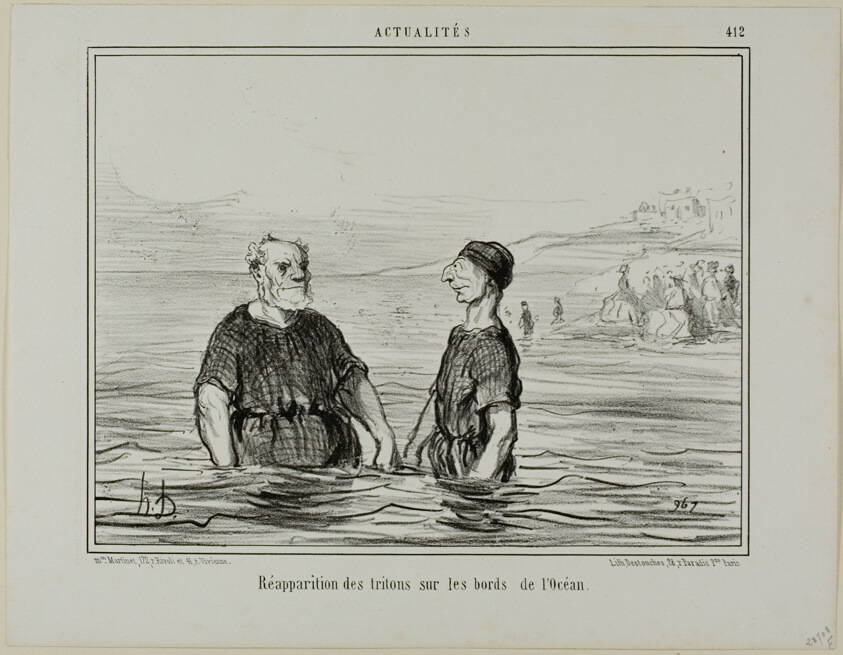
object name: Print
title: The Reappearance of the Tritons of the Sea, plate 412 from Actualités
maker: Honoré Victorin Daumier; French, 1808-1879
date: 1857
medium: Lithograph in black on white wove paper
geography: France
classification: lithograph; print; prints and drawing